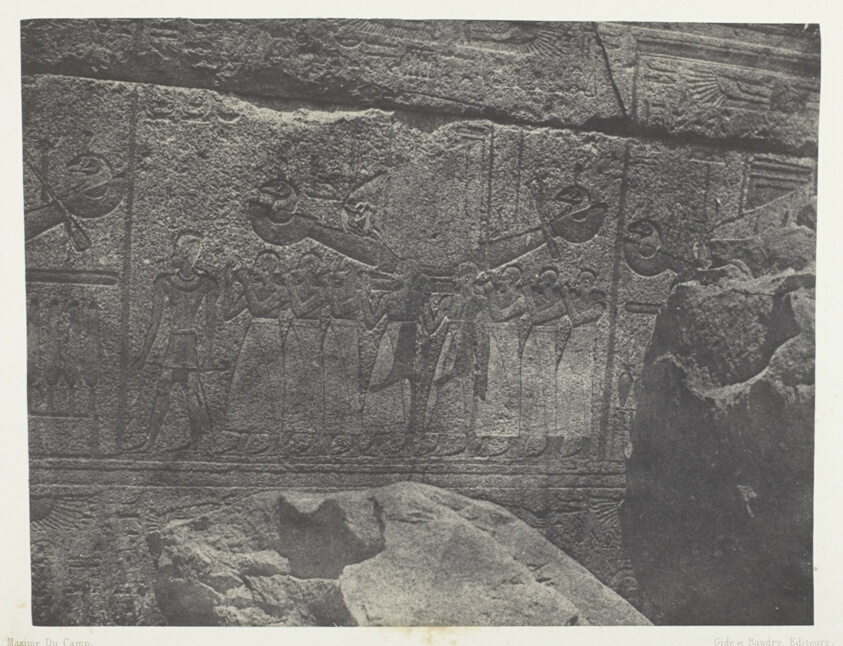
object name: Photograph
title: Palais de Karnak, Sculptures Extérieures du Sanctuaire de Granit; Thèbes, plate 40 from the album "Egypte, Nubie, Palestine et Syrie" (1852)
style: 19th century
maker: Maxime Du Camp (French, 1822–1894)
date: 1849/51, printed 1852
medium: Salted paper print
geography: France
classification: salted paper print; photographic process; photography; photograph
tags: Collected by Hugh Edwards, Egypte, Nubie, Palestine et Syrie